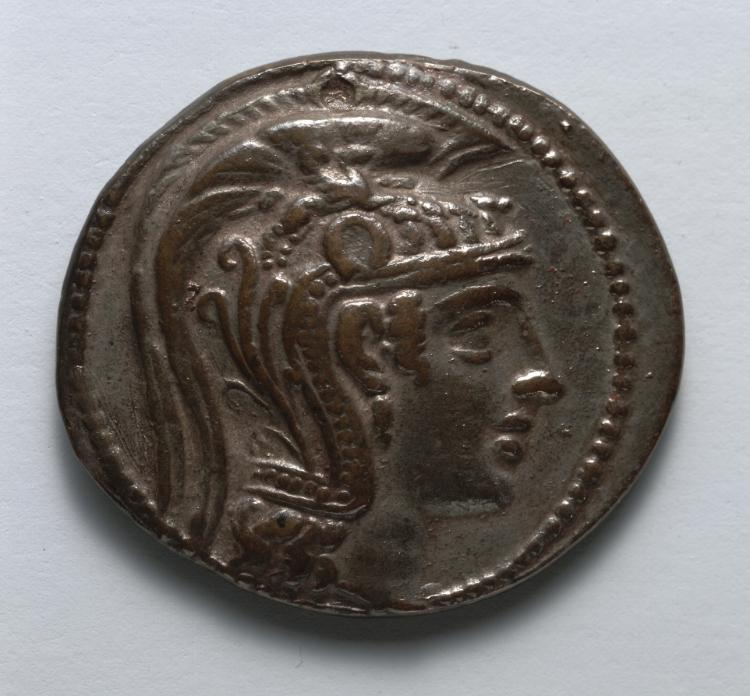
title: Electrotype Replica of Tetradrachm: Head of Athena Parthenos (obverse)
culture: Greece (?)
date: 1838–1916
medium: Silver-plated copper alloy (?)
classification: Coins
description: With a green tint betraying its copper content, this coin is an electrotype replica created more than a century ago. It precisely replicates the form of a 2nd-century BC original. Retaining the basic scheme of Athena and owl from earlier Athenian coinage, these “New Style” tetradrachms—as scholars call them—give the goddess a more naturalistic appearance and add an amphora, olive wreath, and magistrate names to the reverse.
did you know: This silver-plated replica weighs about 12 grams, nearly 30% less than a pure silver tetradrachm.